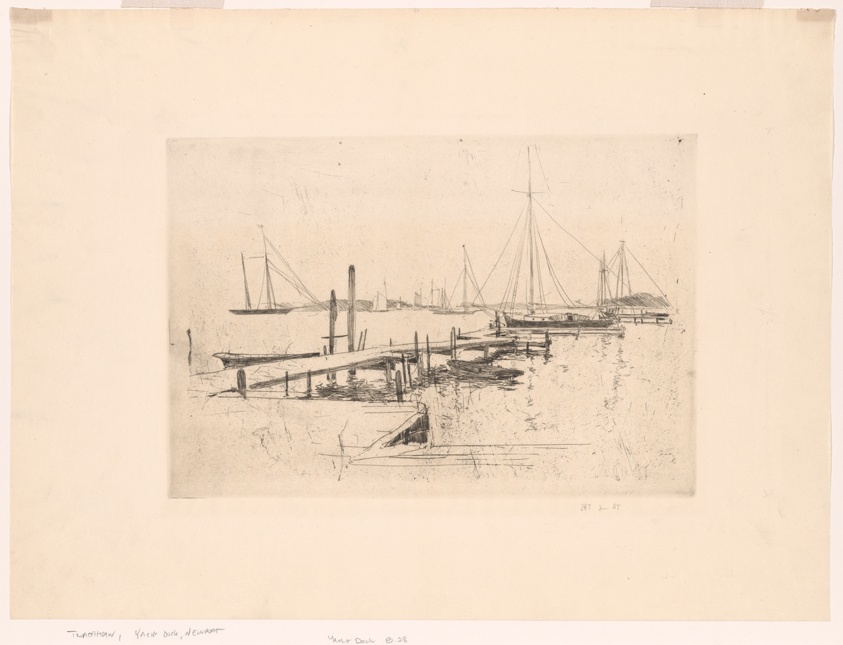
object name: Print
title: Yacht Dock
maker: John Henry Twachtman (American, 1853-1902)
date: c. 1889, printed 1921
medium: Etching in black on cream wove paper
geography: United States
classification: prints and drawing; paper; print; etching